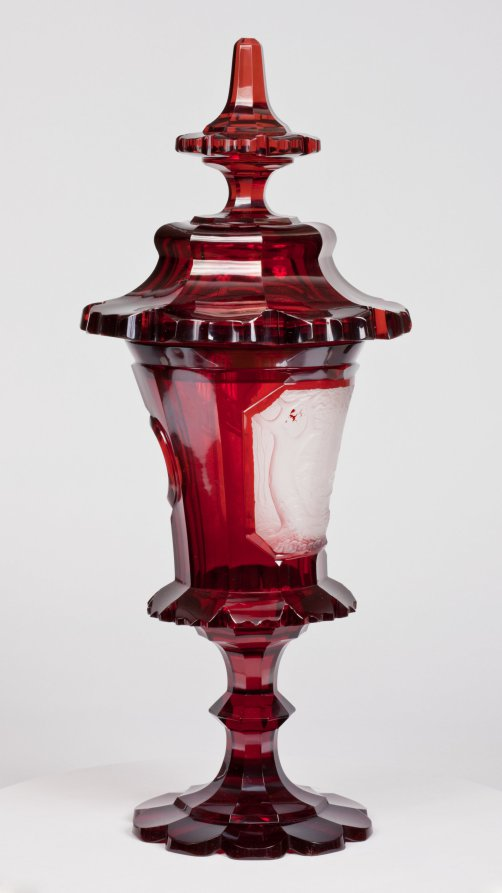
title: Covered Cup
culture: Bohemia, 19th century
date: mid-1800s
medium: ruby glass with engraved decoration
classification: Glass